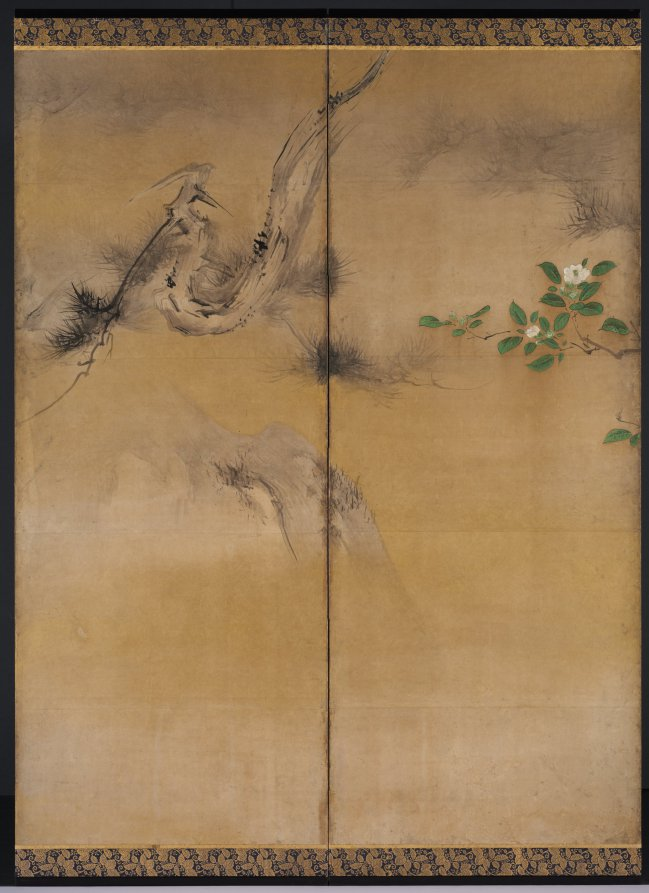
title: Winter and Summer Flowers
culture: Japan, Momoyama period (1573–1615)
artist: Kaihō Yūshō (Japanese, 1533–1615)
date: c. 1600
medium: One of a pair of six-panel folding screens; ink, color, and gold on paper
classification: Painting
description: White camellias bloom behind a large pine in the right screen and blue morning glories creep through bamboo in the left screen of this composition. The mountains and bridge suggest a continuous landscape, but the paintings actually juxtapose flowers of winter and summer, with time progressing from right to left. Kaihō Yūshō painted similar landscapes for Zen temples in Kyoto.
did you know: The pine and bamboo are defined by ink wash, but the flowers take form through color within contour lines.